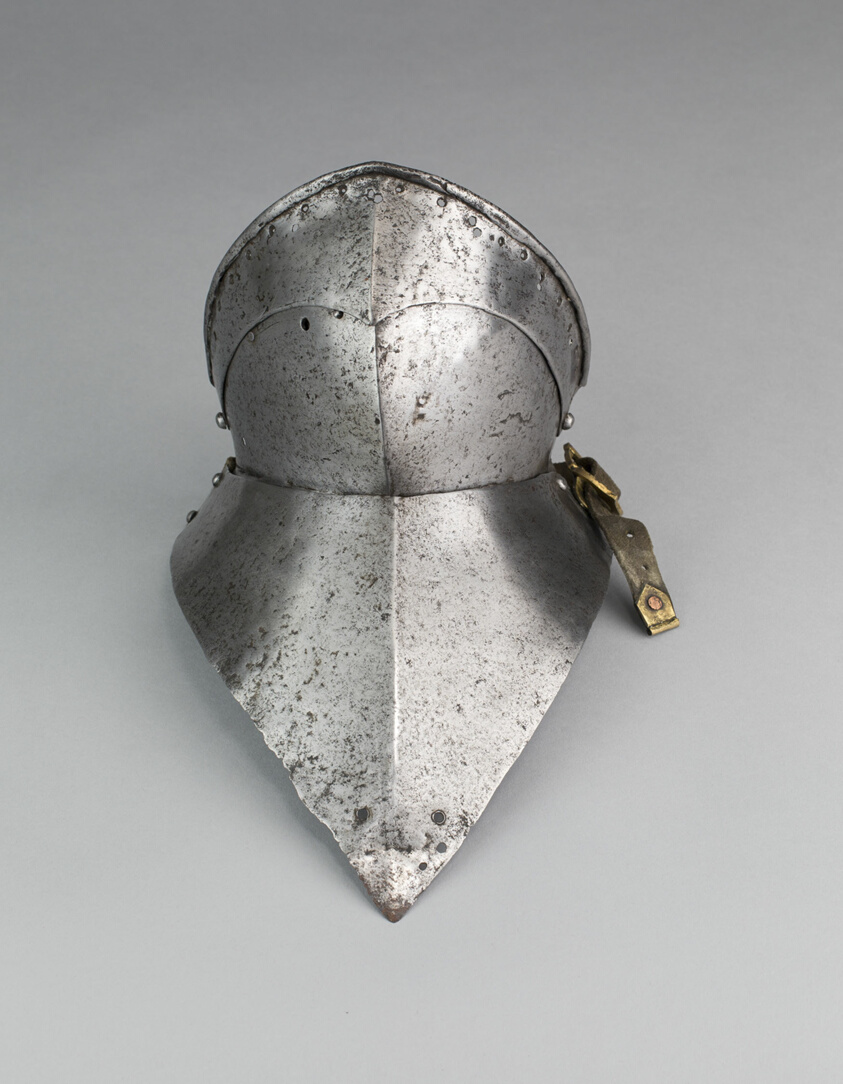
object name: Armor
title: Bevor ("Falling Buff") and Gorget Plate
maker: Spanish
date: c. 1490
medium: Steel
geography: Europe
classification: suit-element; armor; arms and armor